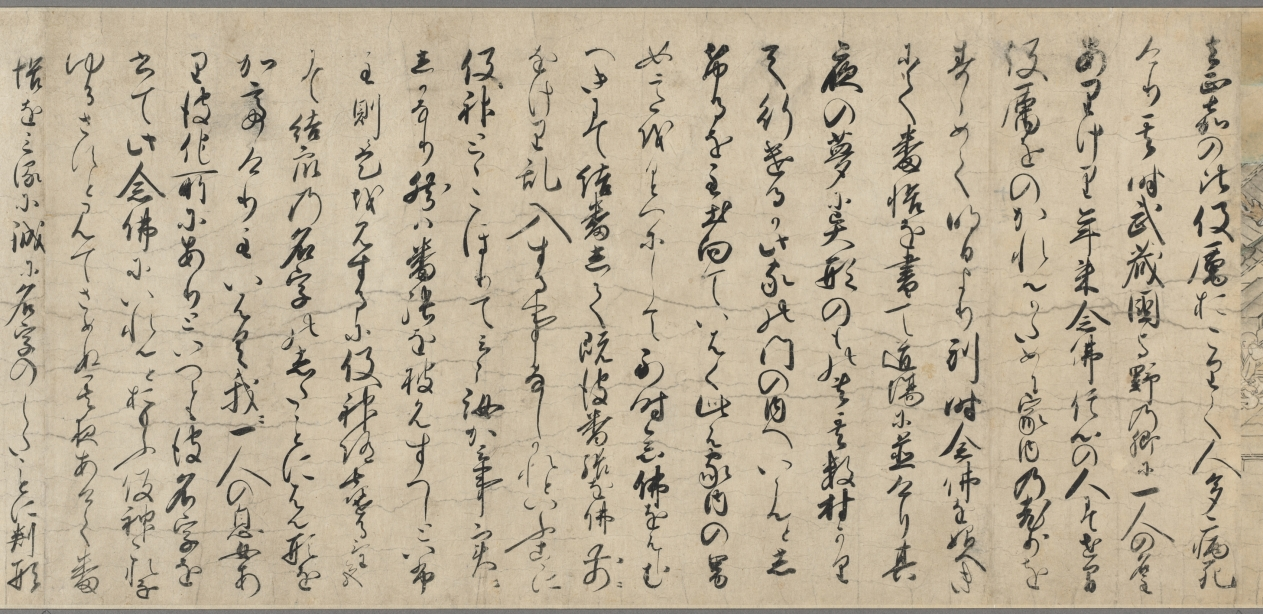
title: The Illustrated Miraculous Origins of the Yūzū Nenbutsu School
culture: Japan, Kamakura period (1185–1333)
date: early 1300s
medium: Handscroll; ink, color, and gold on paper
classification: Painting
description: This painting is the second of a set of two illustrated handscrolls. The first scroll depicts the biography of the Japanese Buddhist monk Ryōnin. This scroll begins with scenes of Ryōnin’s death and relates episodes illustrating the efficacy of following his teachings. Ryōnin asserted the total interconnectedness of all things and the spiritual benefit of chanting the name of the Buddha Amida for one another.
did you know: The other scroll from this two-scroll set belongs to the Art Institute of Chicago.